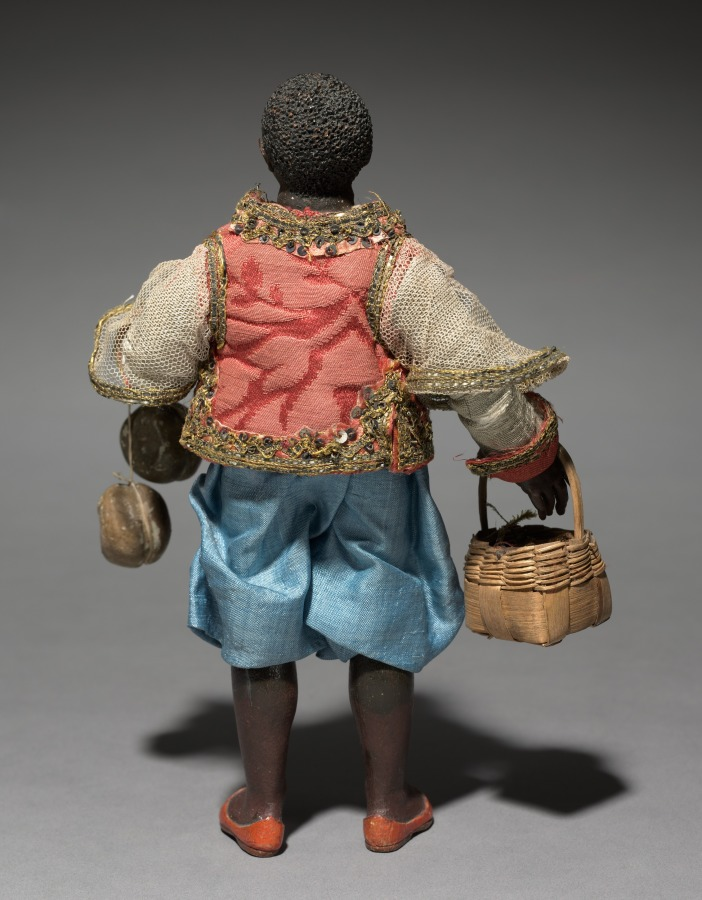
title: Figure from a Crèche: Attendant of the Magi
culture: Italy, Naples, late 18th-early 19th century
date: 1780–1830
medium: painted wood and terracotta with various textiles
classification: Sculpture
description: The practice of creating scenes of the Nativity for the home dates from the early 1700s in Italy, where people began to set up doll-like figures of about a foot or less in height. The custom was particularly popular in Naples around 1800, where crèche scenes (crèche means cradle, or crib) included many figures, whose heads and hands of painted terracotta, stuffed cloth bodies, and clothing adapted from contemporary local costumes gave them an amazingly realistic character. Representations of the birth of Jesus can be traced to the first few centuries of Christianity. Both living creatures and sculptural depictions of them were used from early times. By the late middle ages it was customary to create life-size figures of wood or stone, naturalistically painted, to represent the characters who participated in the events of Jesus's early life. These sculptures were then arranged in scenes illustrating one or both of the most important of these events, the Adoration of the Shepherds and the Adoration of the Magi-the three kings from the East who came to pay homage to the Christ child. Used in churches, these large figures were especially popular in Italy, Central Europe, Spain, and Portugal. This Object in Focus presentation was organized by Henry Hawley, Curator of Renaissance and Later Decorative Arts and Sculpture.